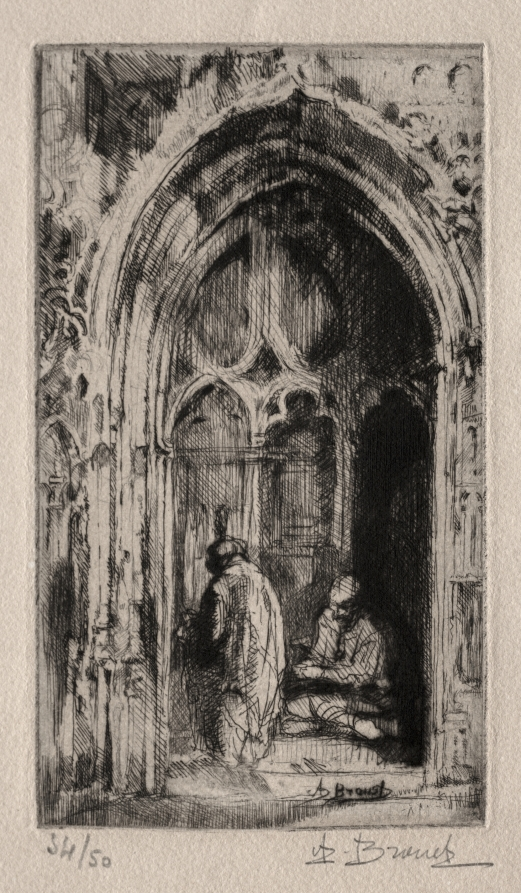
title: Gothic Doorway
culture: France, 20th century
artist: Auguste Brouet (French, 1872–1941)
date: c. 1902–41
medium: etching and drypoint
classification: Print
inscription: in graphite, lower left: 34/50; lower right: A. Brouet; signed in plate